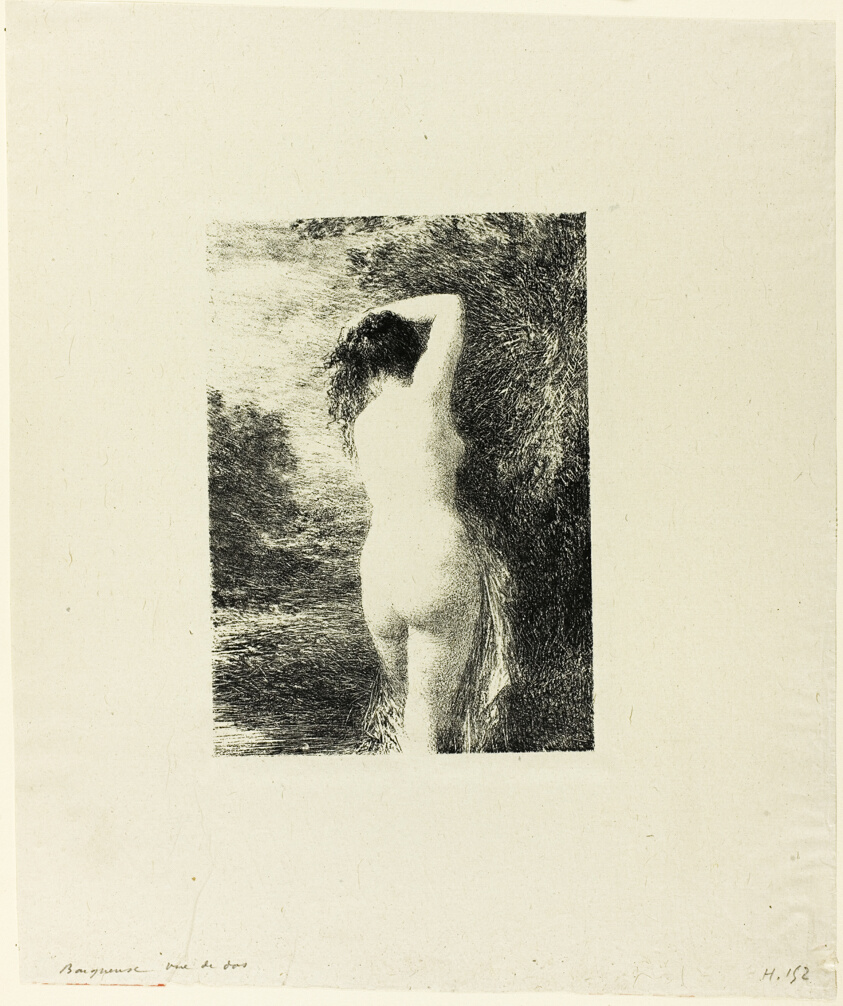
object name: Print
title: Standing Bather, third plate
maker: Henri Fantin-Latour (French, 1836-1904)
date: 1899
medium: Lithograph in black on light gray chine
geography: France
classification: lithograph; print; prints and drawing